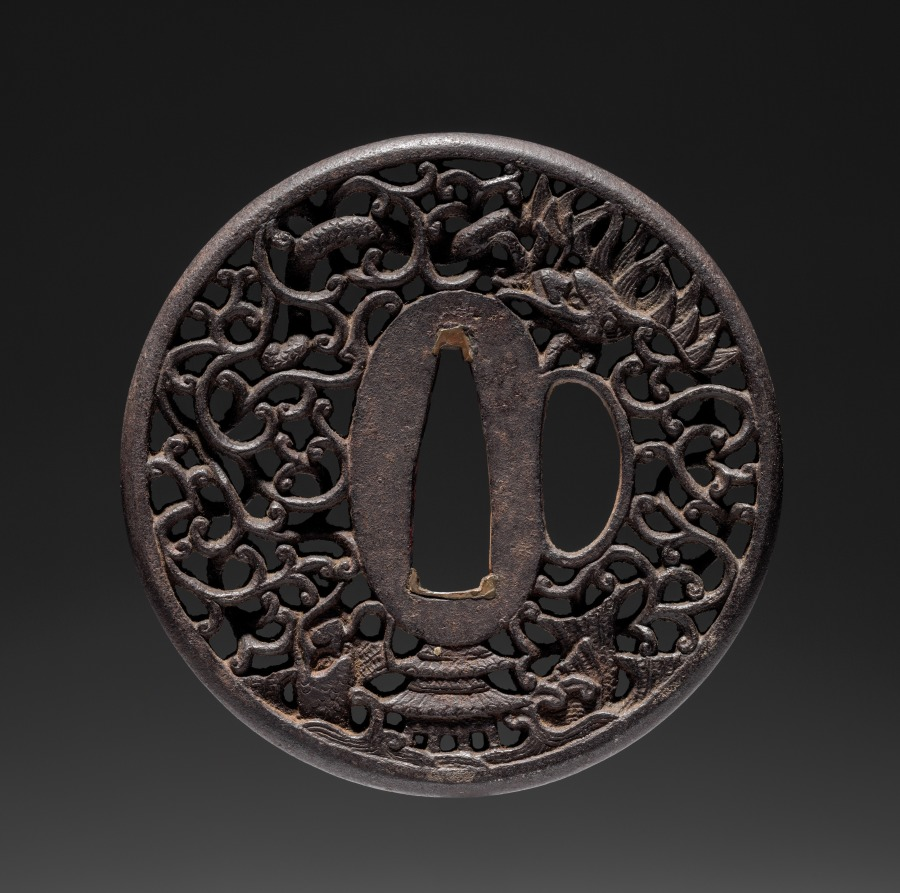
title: Sword Guard (Tsuba) with Dragon and Palace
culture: Japan, possibly Edo period (1615-1868)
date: c. 1615–1868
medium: iron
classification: Arms and Armor